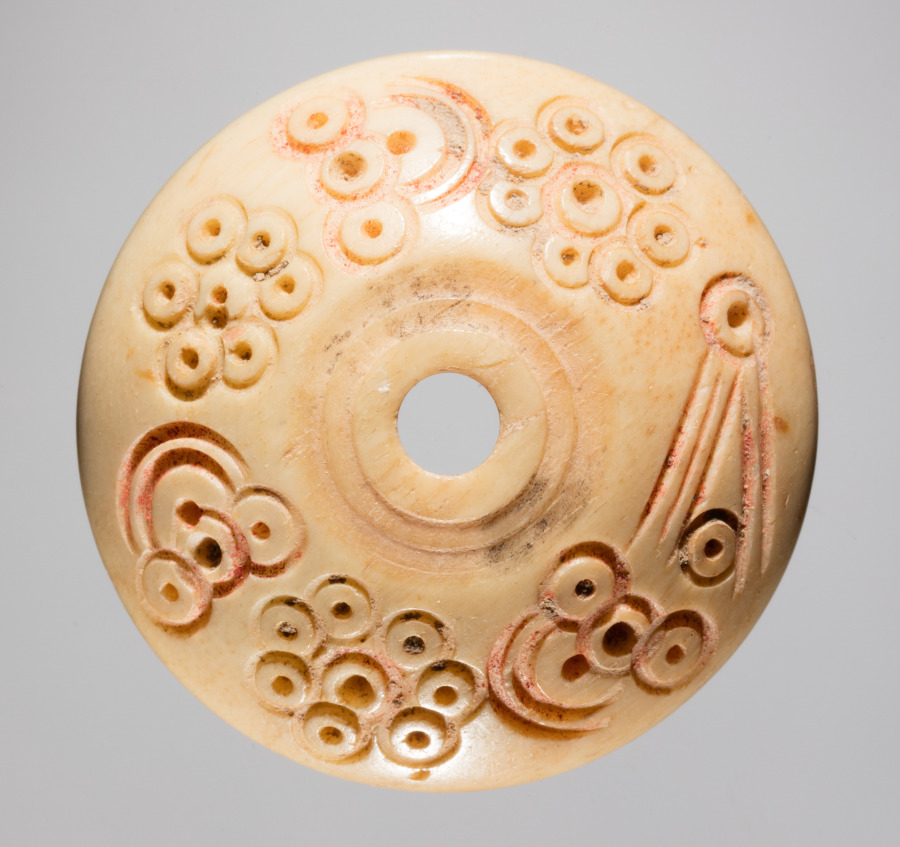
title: Spindle Whorl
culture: Iran, early Islamic period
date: 700s - 900s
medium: bone, incised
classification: Spindle Whorl